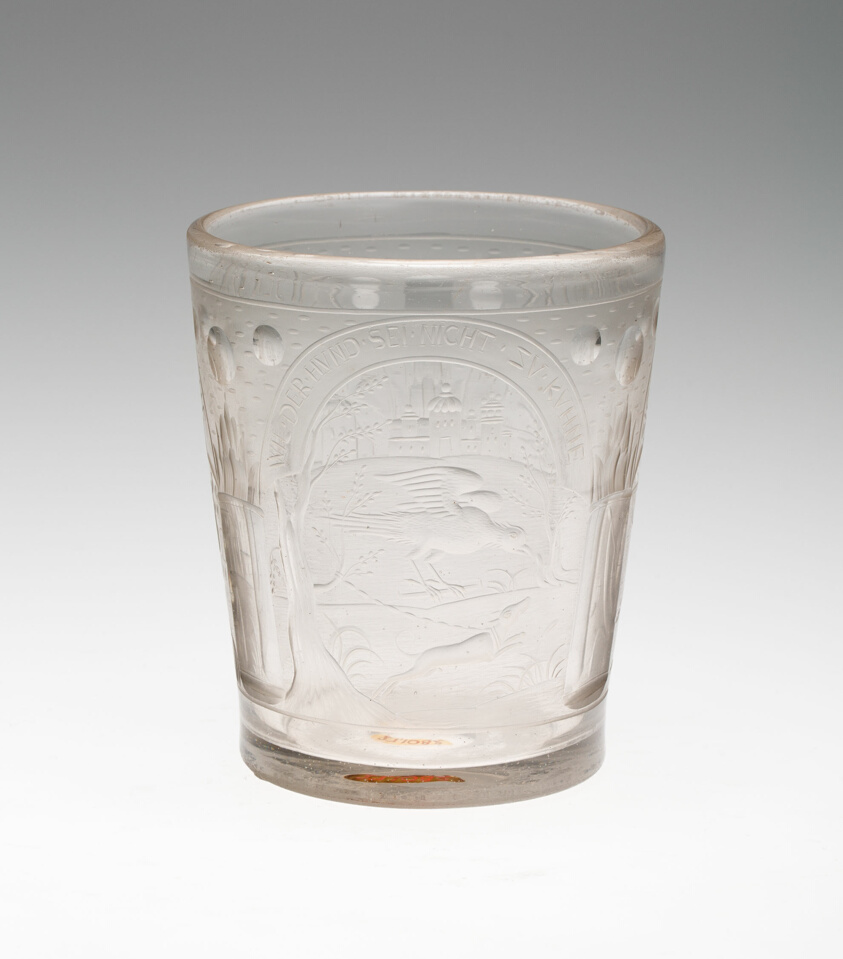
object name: Glass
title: Beaker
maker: Bohemia, Czech Republic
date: 18th century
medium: Glass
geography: Bohemia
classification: glass; european decorative arts